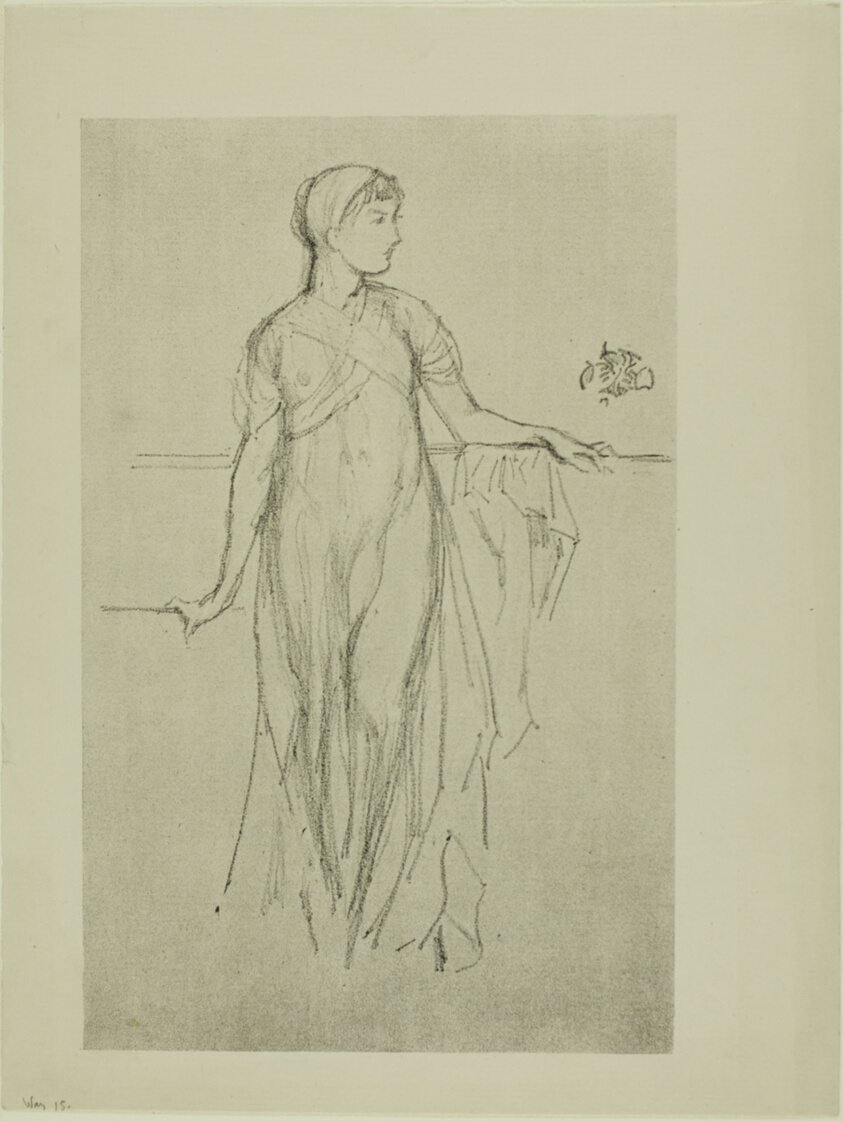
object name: Print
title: Study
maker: James McNeill Whistler (American, 1834-1903)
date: 1879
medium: Lithograph, in black ink, on a prepared half-tint ground, with scraping, on cream laid paper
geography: United States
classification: lithograph; print; prints and drawing; paper